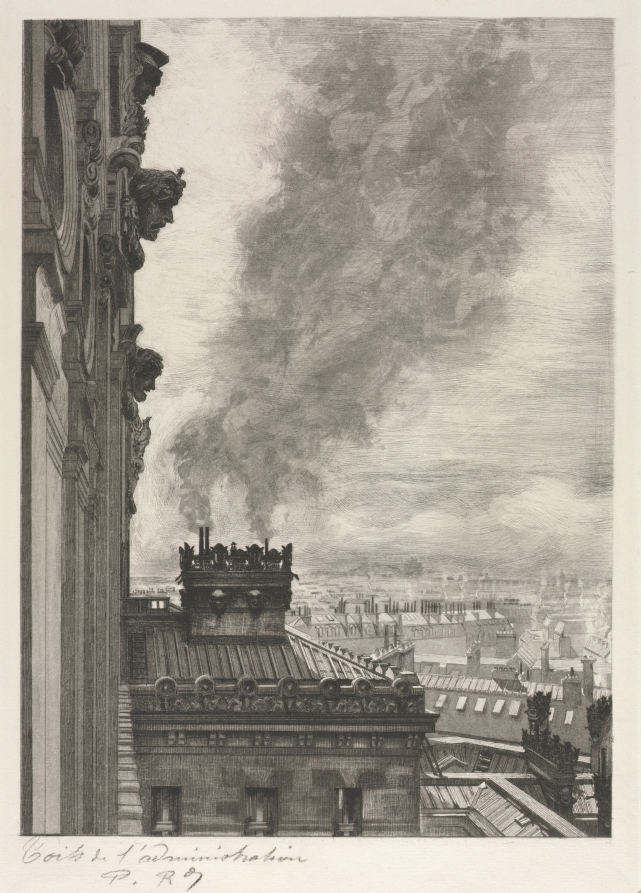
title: Rooftops of the Administration Building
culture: France, 19th century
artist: Charles Paul Renouard (French, 1845–1924)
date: 1881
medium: etching and aquatint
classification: Print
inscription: inscribed lower left, in black crayon: "Coin de l'administration P. Renouard"